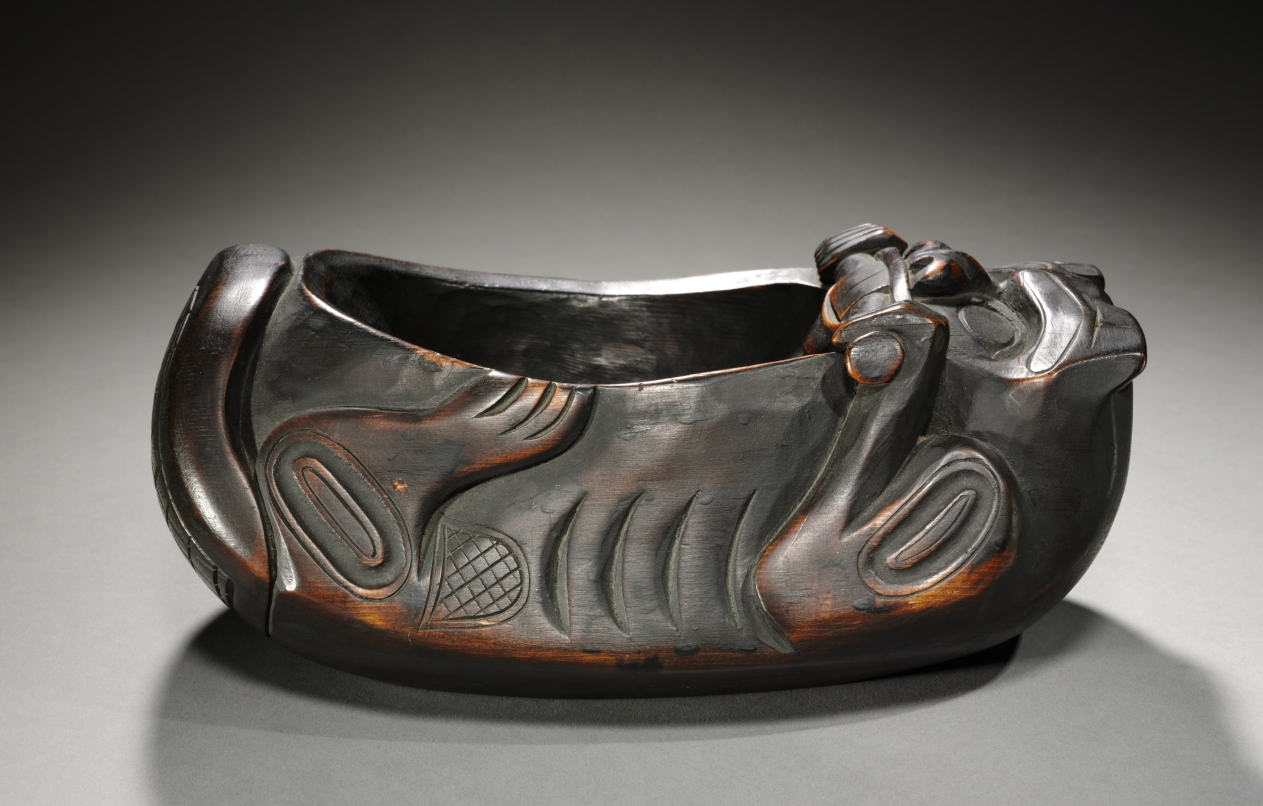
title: Beaver-Shaped Bowl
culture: Native North America, Northwest Coast, Alaska, Tlingit?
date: c. 1890–1920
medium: wood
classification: Wood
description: Bowls were a major Northwest Coast art form, used in many contexts including potlatch feasts that validated the rights and privileges of wealthy noble families. When Euro-American settlement forced a change from traditional to cash economies in the early 1900s, Indigenous carvers turned their skills to creating bowls like this example for the outside market.